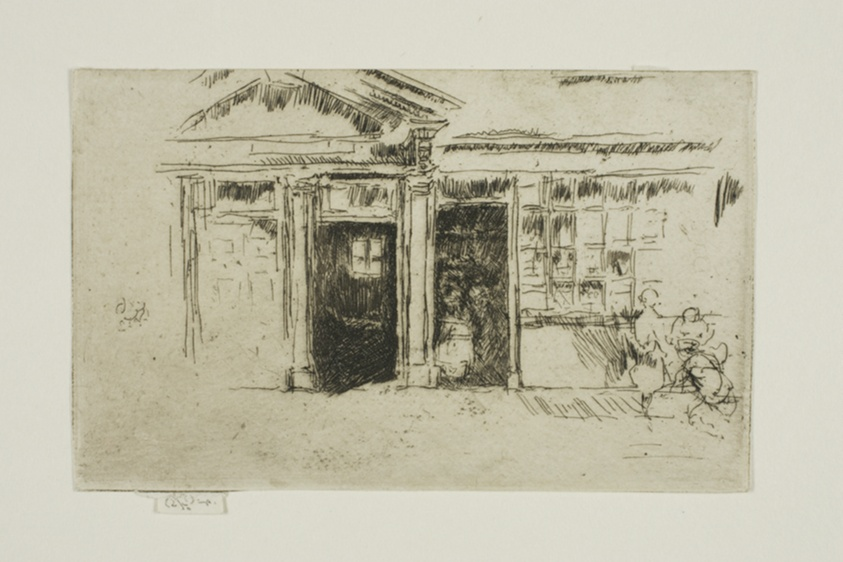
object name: Print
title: Double Doorway, Sandwich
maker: James McNeill Whistler (American, 1834-1903)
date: 1887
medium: Etching and drypoint with foul biting in black ink on cream laid paper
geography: United States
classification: etching; foul biting; print; prints and drawing; paper; drypoint